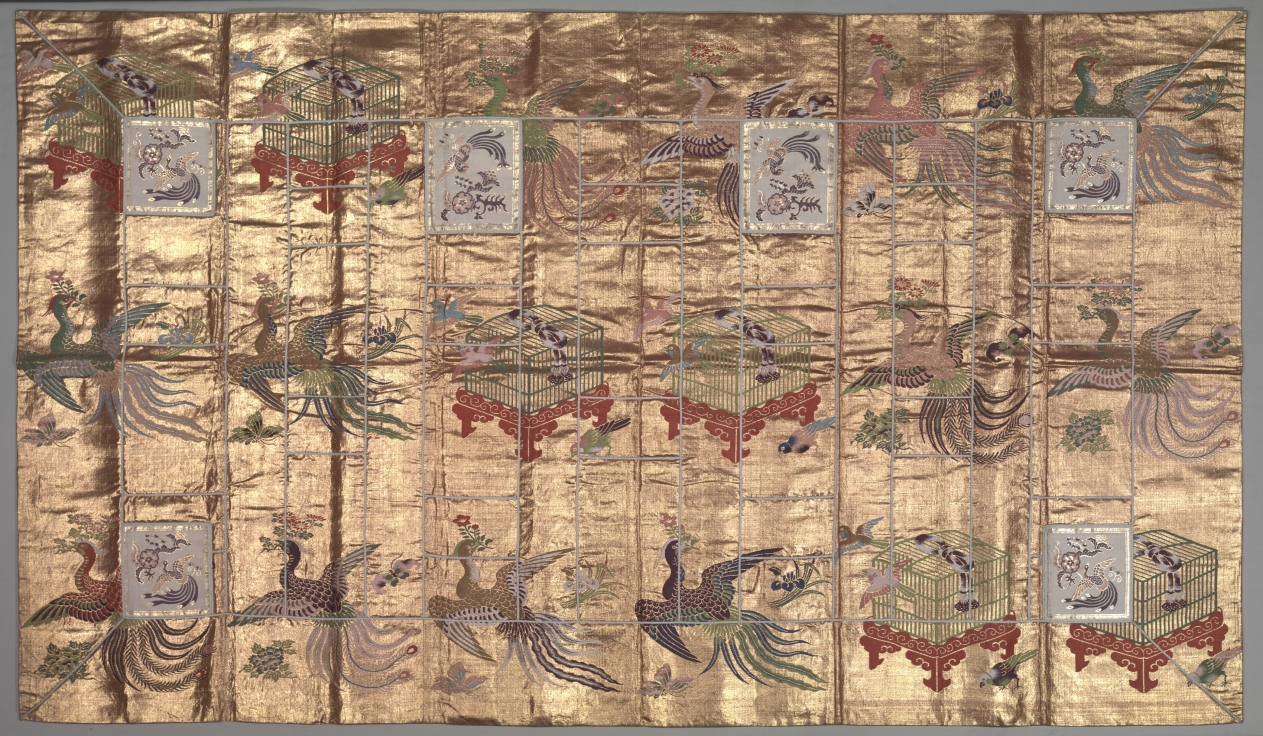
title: Buddhist Vestment (Kesa)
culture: Japan, Meiji period (1868–1912)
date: early 1900s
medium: silk with supplementary weft, brocaded; metal thread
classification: Garment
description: Kesa are Buddhist monastic robes that originated in India. The robes are named after the brown or saffron dye originally used in their production. The primary motif on this seven-paneled kesa is a long-tailed bird with a flower in its mouth. This motif was imported from Persia (present-day Iran) through China during the Nara period (710–794)and is interpreted as a positive symbol. The bird delivers happiness in its mouth.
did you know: This kesa depicts bird cages, but all the birds portrayed fly free.